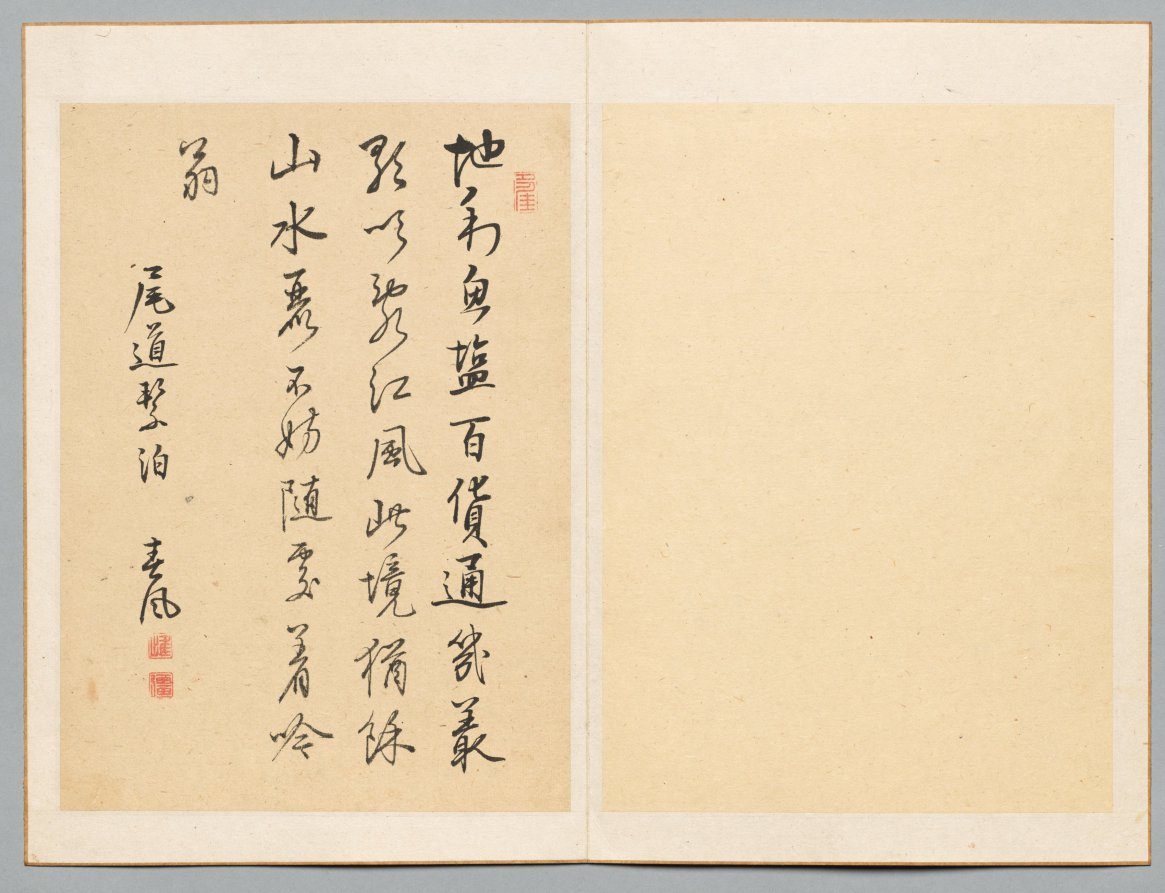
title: Poem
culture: Japan, Edo period (1615–1868)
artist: Rai Shunpū (Japanese, 1753–1825)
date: early 1800s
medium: leaf from a pair of folding albums; ink on paper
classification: Portfolio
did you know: Rai Shunpū studied medicine in Kyoto, and opened the first medical practice in Takehara, in what is today the western part of Hiroshima prefecture.